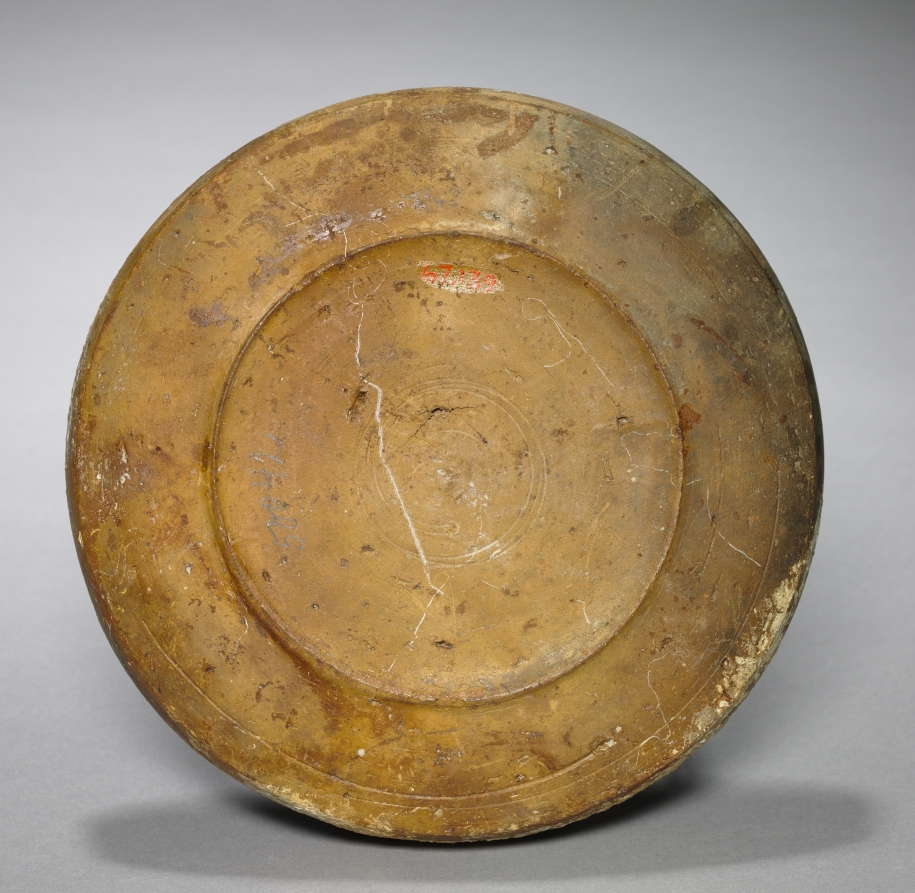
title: Deep Plate with Hawk and Foliage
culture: Byzantium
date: 1100s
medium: sgraffito earthenware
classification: Ceramic